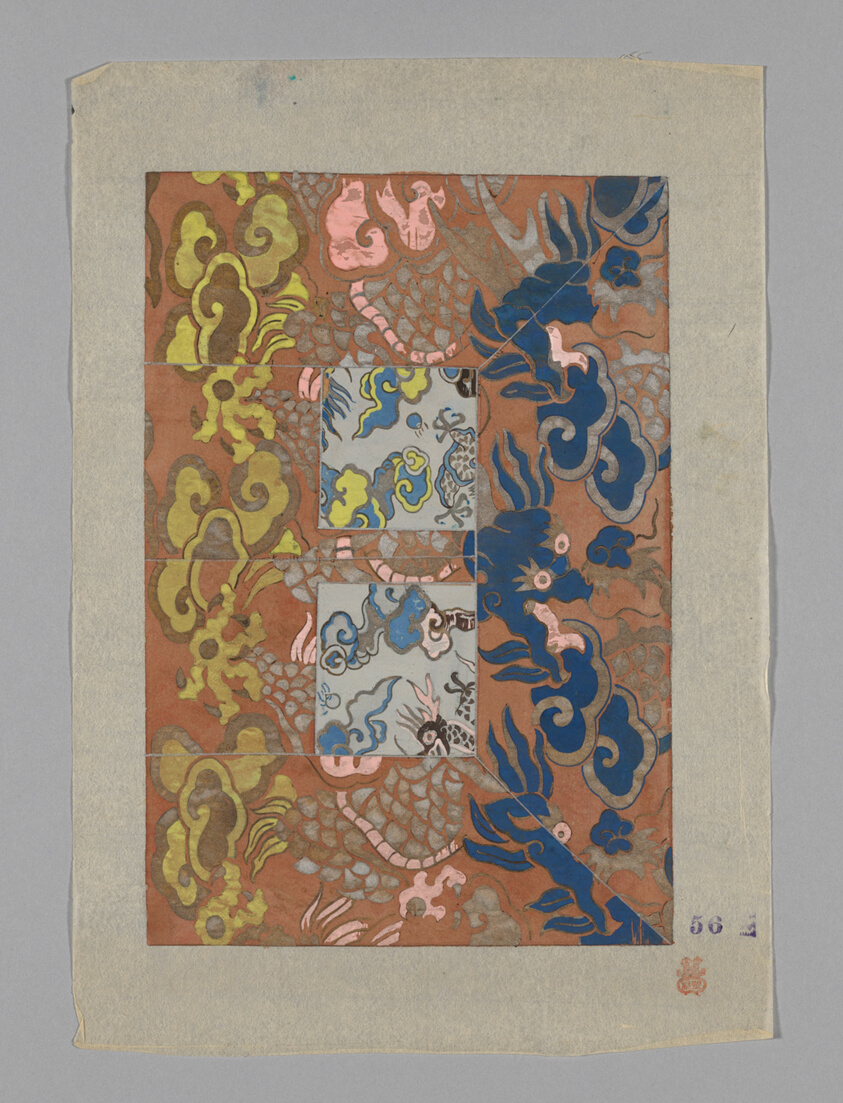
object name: Drawing and Watercolor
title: Design on Paper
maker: Japan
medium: Paper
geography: Japan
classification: textile; accessory - paper design; watercolor; paper